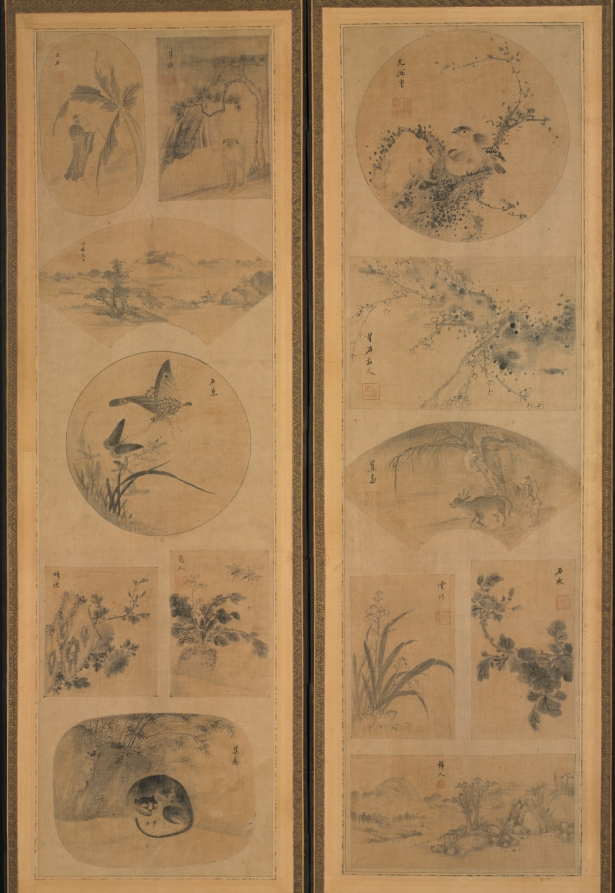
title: Painting of One Hundred Themes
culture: Korea, Joseon dynasty (1392–1910)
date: late 1800s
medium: Ten-panel folding screen affixed with album leaves (obverse), calligraphy (reverse), ink and color on silk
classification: Painting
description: The front of this screen features an assortment of subjects: birds and flowers, landscapes, and scenes of everyday life, mostly in monochromatic ink with light colors. The screen’s reverse side conveys a number of classical poems about the fleeting beauty of the four seasons. Traditionally, only one side of a folding screen bears painted or embroidered images, since these were used as a background furnishing. In Korean houses by the 1800s and early 1900s, however, two-sided folding screens became noticeably popular, possibly inspired by Japanese double-sided folding screens, which mainly served as room dividers in Japanese households.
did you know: The way of displaying small images of various subjects became one of the most popular type of painting toward the end of the 19th century.